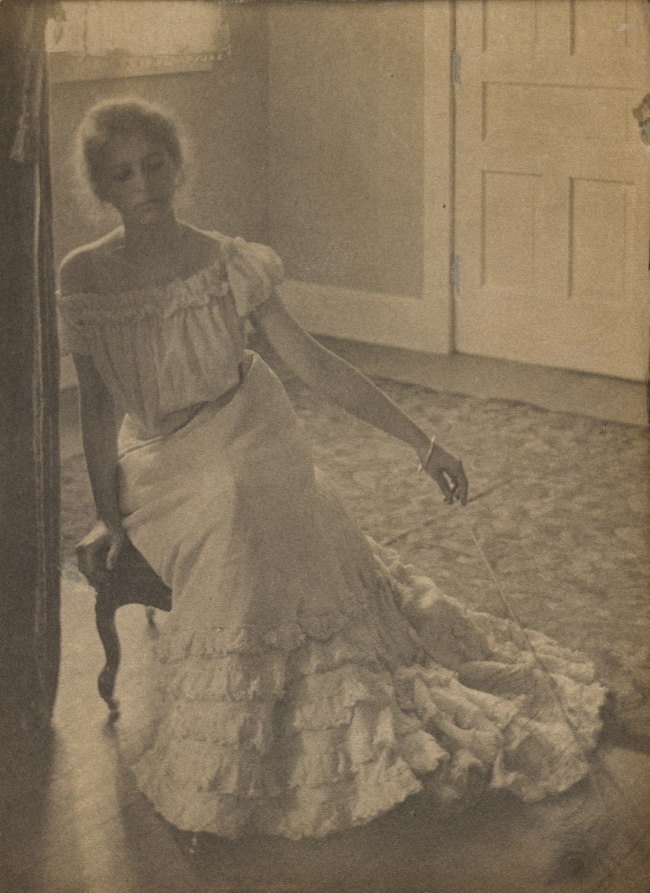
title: The Peacock Feather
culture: America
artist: Clarence H. White (American, 1871–1925)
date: 1902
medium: platinum print with crayon and gouache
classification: Photograph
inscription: Written in pencil on recto of mount: "Clarence H. White [signed] '2"